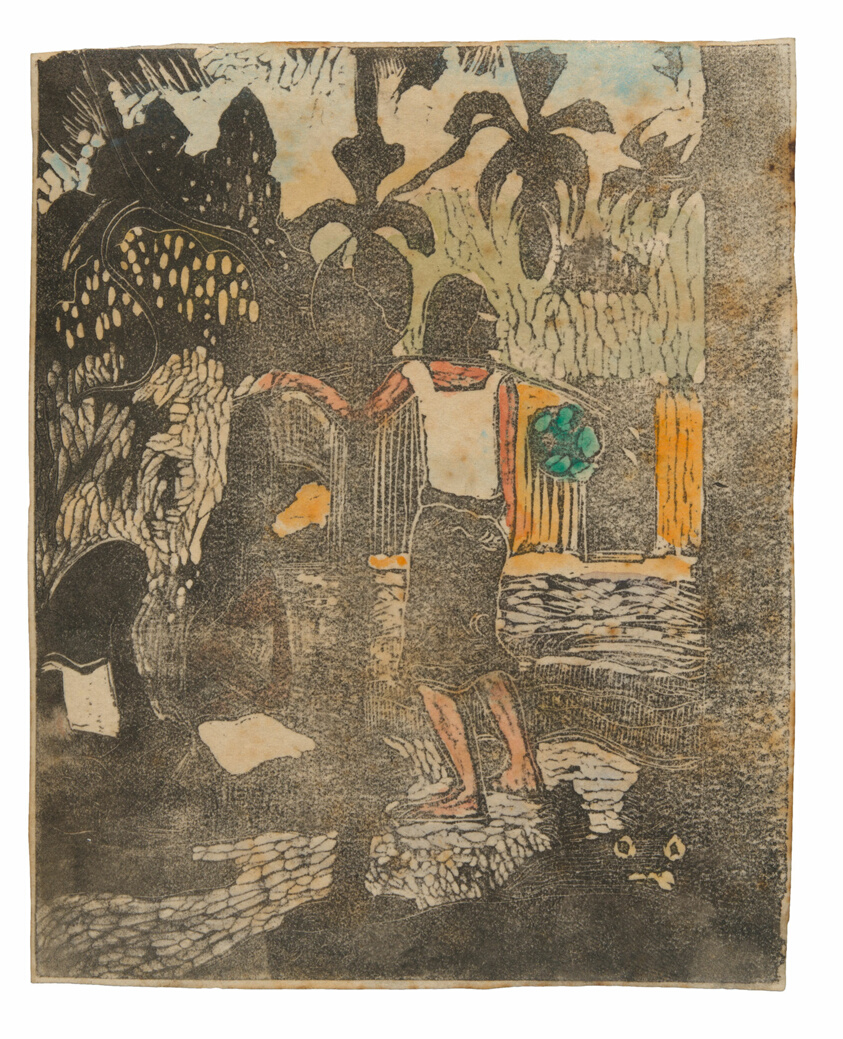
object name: Print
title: Noa noa (Fragrant)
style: Post-Impressionism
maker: Paul Gauguin (French, 1848-1903)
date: 1894/95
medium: Wood-block print in black ink, with red, orange, blue, mauve, light green, and green watercolor on parchment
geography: France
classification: woodcut; print; prints and drawing